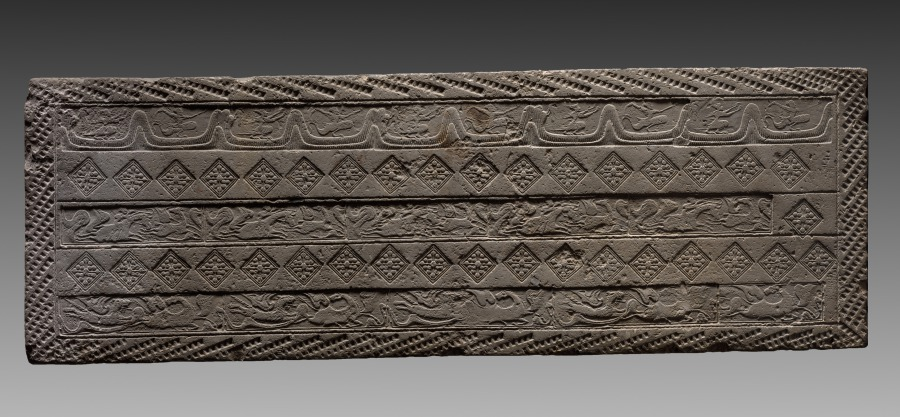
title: Tomb Tile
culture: China, Han dynasty (202 BCE–220 CE)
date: 206 BCE–220 CE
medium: earthenware with stamped decoration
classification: Ceramic